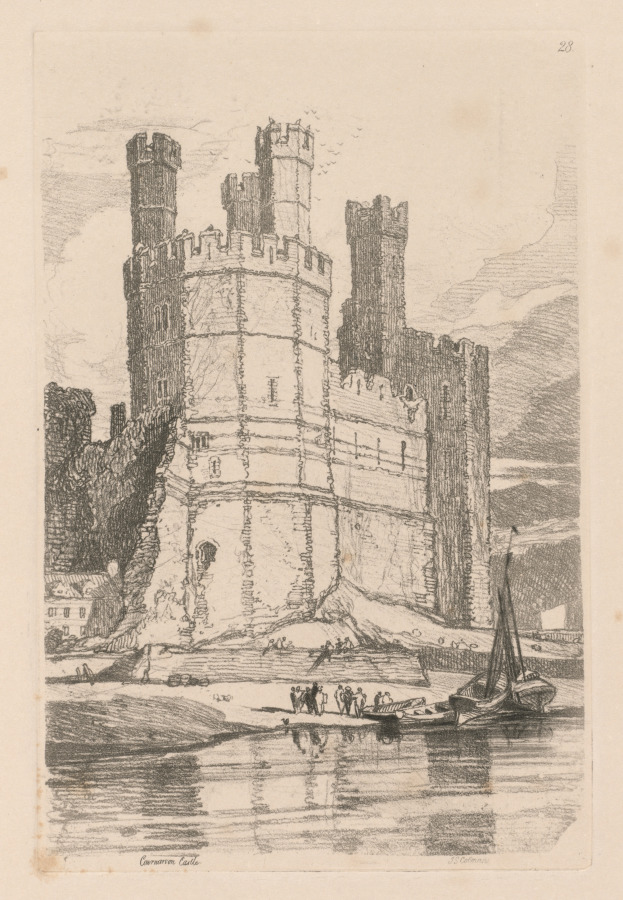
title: Liber Studiorum: Plate 28, Caernarvon Castle, N. Wales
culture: England, 19th century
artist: John Sell Cotman (British, 1782–1842)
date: 1838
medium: softground etching, from a bound volume containing 48 plates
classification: Bound Volume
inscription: In plate, within image, upper right: 28; in plate, below image: Caernarvon Castle J S Cotman